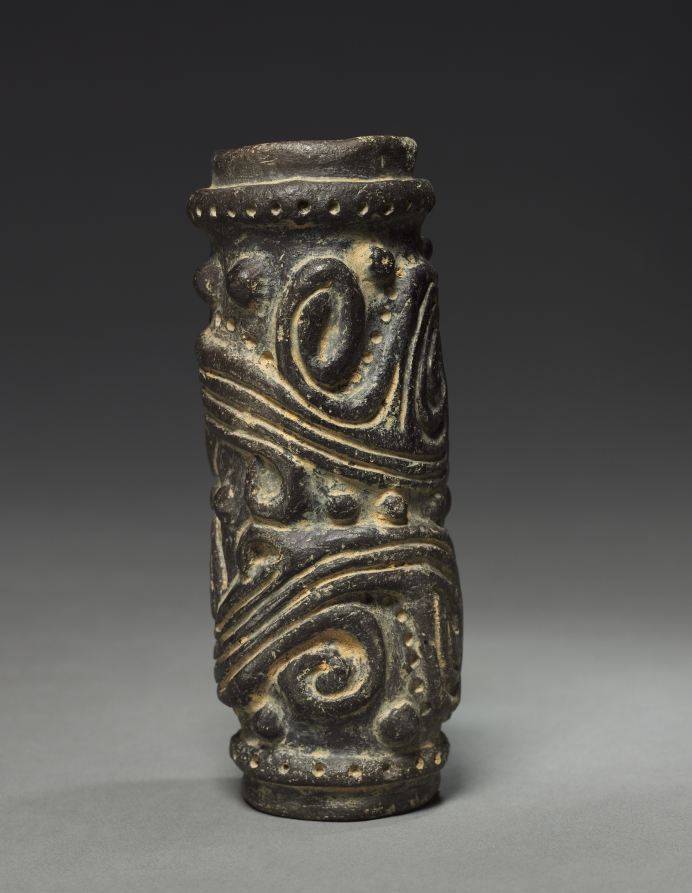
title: Roller Stamp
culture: Colombia, 19th-20th century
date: before 1921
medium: black ware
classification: Ceramic